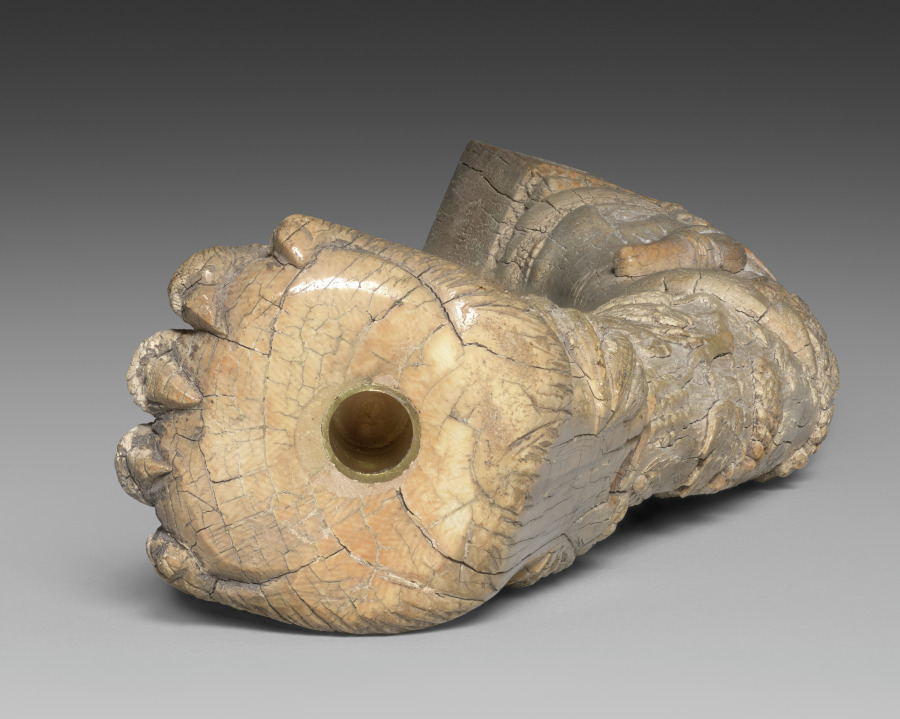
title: Chair Leg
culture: Afghanistan, Begram, Kushan period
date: 300s CE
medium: ivory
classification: Ivory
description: This ivory carving was made to sheath wooden furniture made in India for trade along the Silk Road, which stretched from Rome to China. Indian ivory-faced furnishings--along with lacquer boxes from China and painted glass from Rome--were found in an extraordinary deposit of luxury goods at a site called Begram. The wood on which the ivory and lacquer were affixed has long disintegrated, and only the small pieces remain.